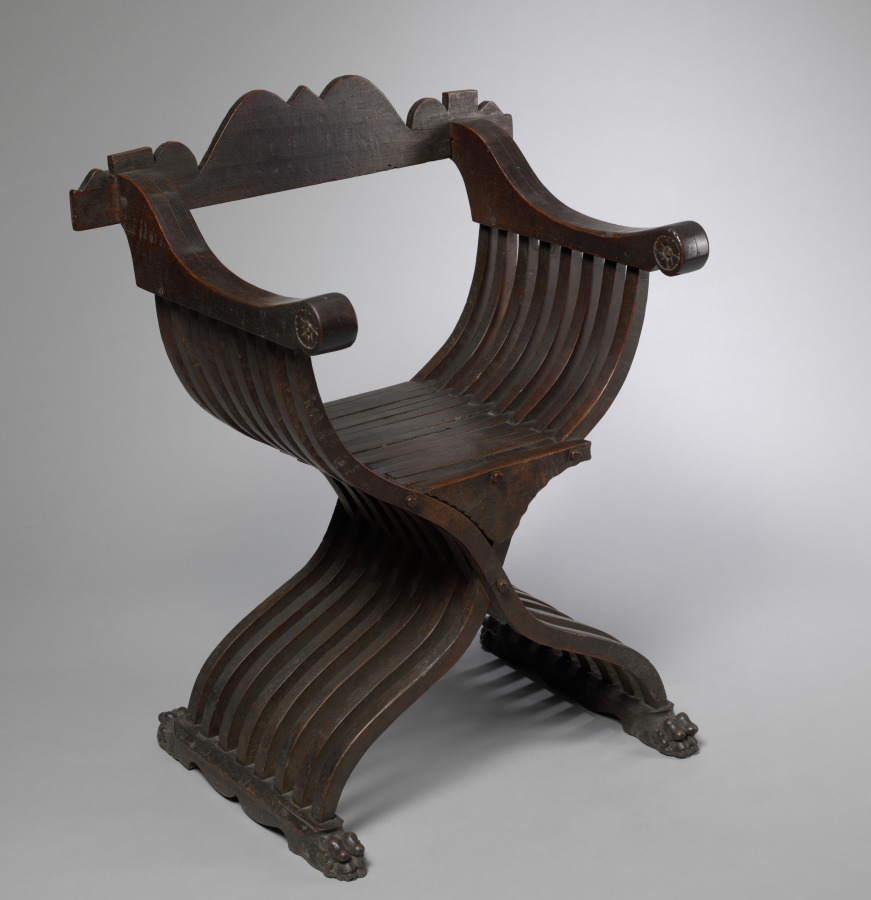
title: Folding Armchair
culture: Italy, early 16th century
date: early 1500s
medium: walnut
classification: Furniture and woodwork